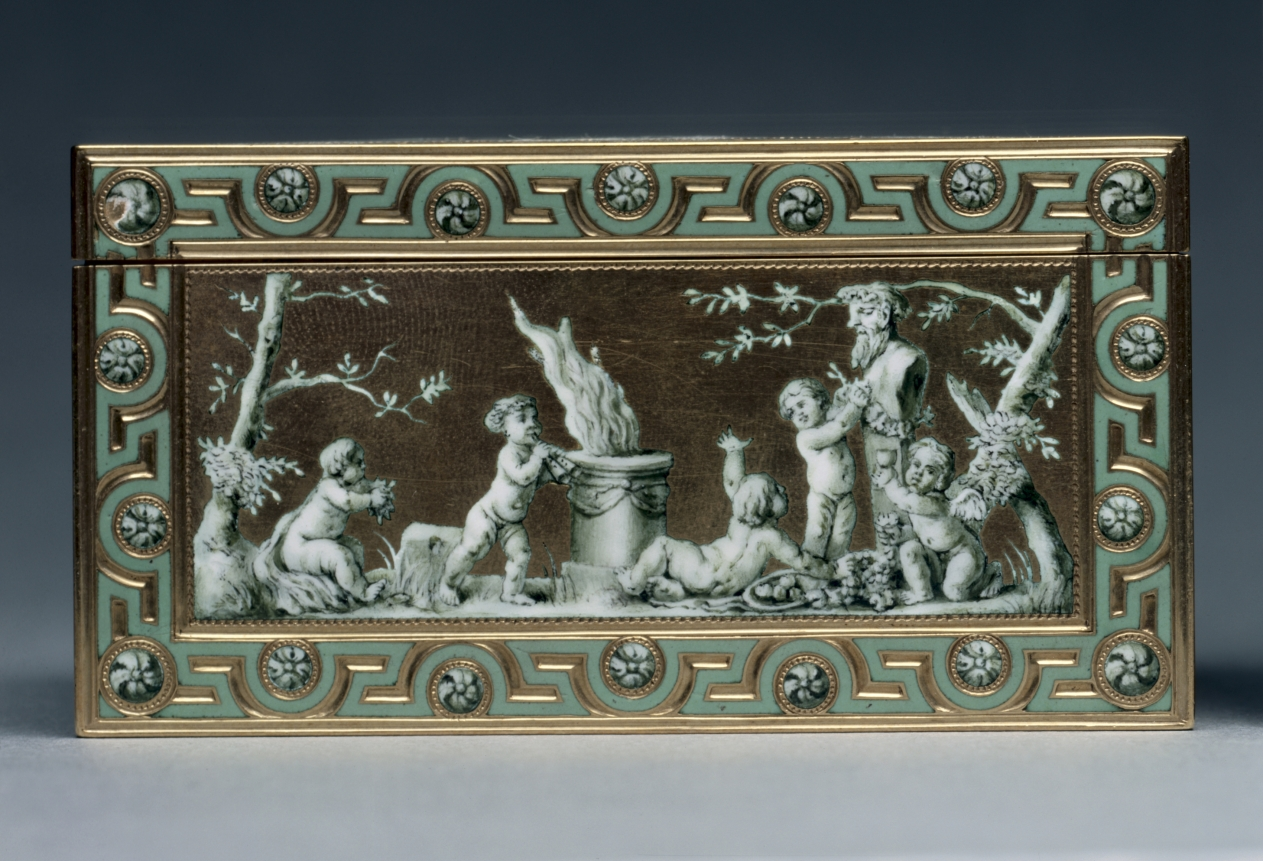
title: Box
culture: France, 18th century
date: c. 1768–1769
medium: gold and enamel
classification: Enamel